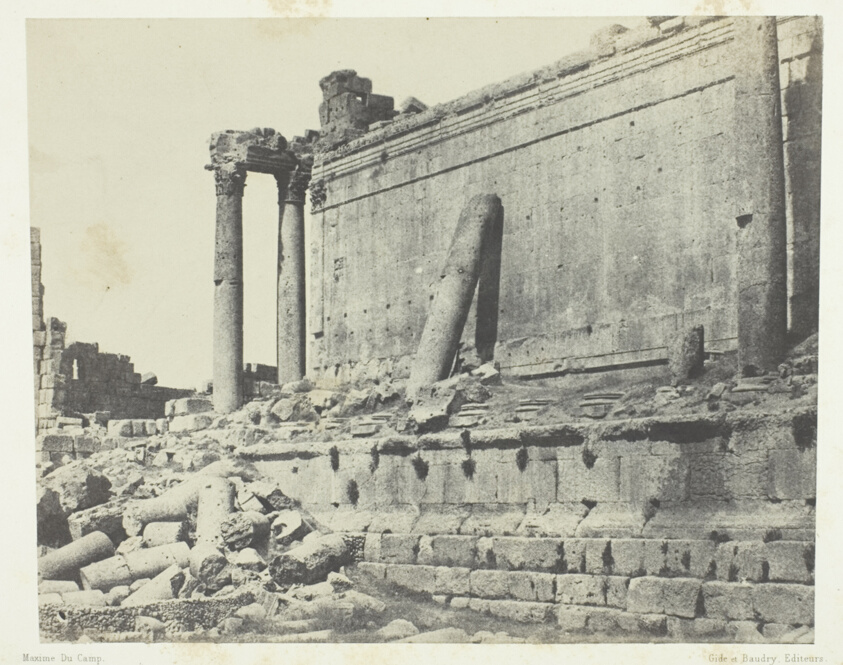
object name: Photograph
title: Baalbeck (Héliopolis), Temple De Jupiter, Façade Orientale; Syrie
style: 19th century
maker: Maxime Du Camp (French, 1822–1894)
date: 1849/51, printed 1852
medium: Salted paper print, plate 123 from the album "Egypte, Nubie, Palestine et Syrie" (1852)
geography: France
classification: salted paper print; photographic process; photography; photograph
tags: Collected by Hugh Edwards, Egypte, Nubie, Palestine et Syrie